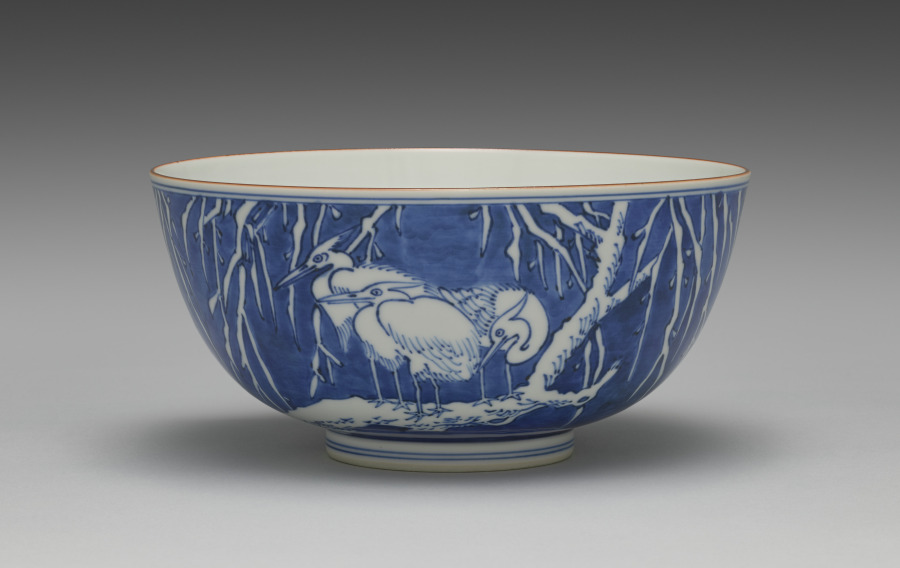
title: Sweets Bowl with Egrets and Willow in Snow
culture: Japan, Meiji period (1868–1912)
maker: Seifū Yohei III (Japanese, 1851–1914)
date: 1912–14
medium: Porcelain with underglaze blue and iron oxide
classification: Ceramic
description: For this sweets bowl, Yohei III designed a dramatic surround of egrets in a willow tree under heavy snow. The entire design is painted in cobalt blue under the transparent glaze. If one turns the bowl clockwise, two egrets come into view, one after the other. As they ascend, both struggle against the wind amid snow-laden weeping willow branches. They are followed by a stretch of willow branches that evoke the bitter cold. The sky is painted with blue washes all around the designs. The imagery culminates in a group of three egrets huddled together in the crotch of the tree. Of course, it is also possible to read the scene in the other direction, in which case the sheltering egrets look toward one of the flying egrets, who looks back at them, and it is the egret with wings outspread, looking directly down, who concludes the scene. Two thin bands of blue set off the design just under the bowl’s rim, and a band of brown iron oxide runs along the rim. Another two bands of blue run around the middle of the foot. The inside of the bowl’s box lid has an attestation by Yohei IV that it is the work of Yohei III.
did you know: This sweets bowl requires someone to rotate it to experience the birds observing one another.